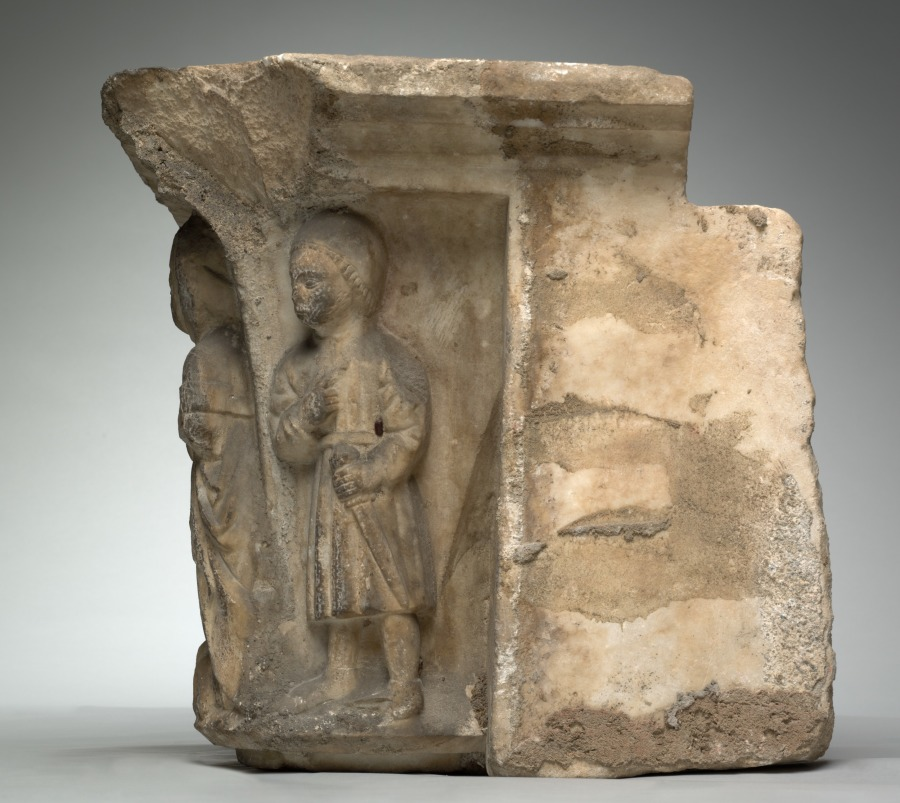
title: Engaged Capital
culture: Southern France, Abbey of Larreule, near Tarbes, 15th century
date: 1400s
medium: limestone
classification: Sculpture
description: This capital belongs to a surviving group including other architectural fragments that once decorated the cloister of the Abbey of Larreule. A cloister was a covered walkway or arcade, usually around all four sides of a square area of grass (the "cloister garth"). The seclusion of the cloister was the monks’ exclusive domain, off limits to others. Here, the monks were supposed to pray, study, meditate, and exercise in privacy and solitude. Such cloister capitals served both to instruct the monks and as a focus for their devotions. Other capitals in this series are installed in the Jardin Massey at Tarbes, near the original abbey. An arch from Larreule has been assembled with other associated French capitals at The Cloisters in New York.